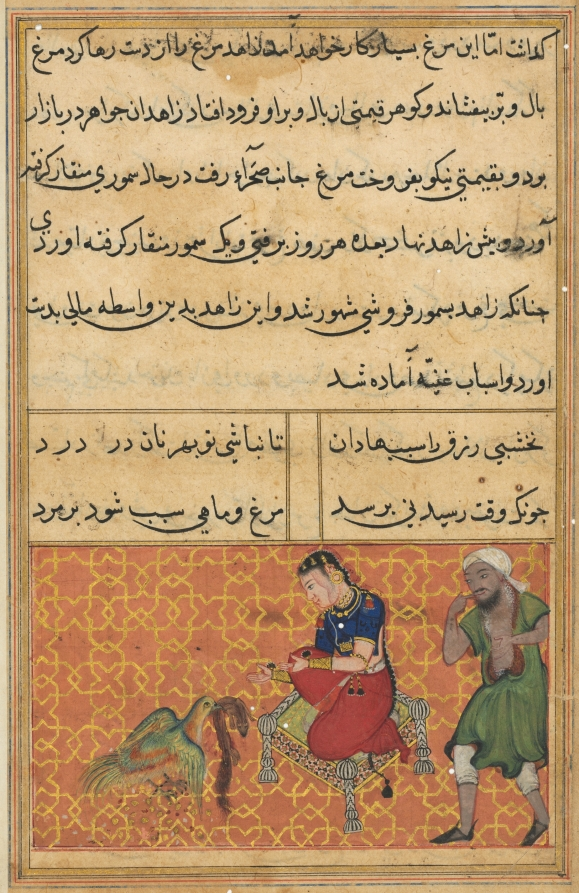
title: The bird of seven colors brings a sable to the pious man, from a Tuti-nama (Tales of a Parrot): Fifty-second Night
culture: Mughal India, court of Akbar (reigned 1556–1605)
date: c. 1560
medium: gum tempera, ink, and gold on paper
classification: Painting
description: The pious man and his wife stare at the fantastic seven-colored bird in surprise. Although it cost the man his final diram, the bird becomes a source of great wealth and prosperity for his family. Every day it leaves and returns with a sable, which the man sells in the market. Soon the man becomes a well-known merchant.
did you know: Several red and yellow gemstones, which fell from the bird’s feathers, rest on the ground at its feet.